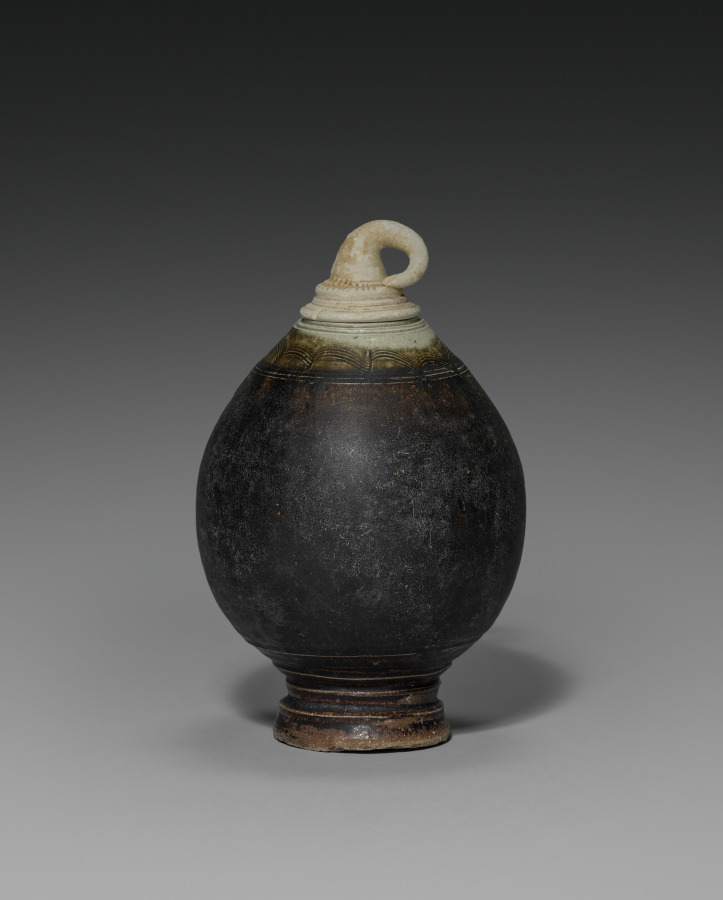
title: Jar in the Shape of a Fruit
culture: Cambodia, Northeast Thai kiln, Khmer Ware, Angkor Wat/Bayon period, 12th century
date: 1100s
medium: glazed pottery with brown slip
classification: Ceramic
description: This dark-brown glazed jar, with the heavy clay body and translucent glaze on the cover and the top just below it, has a rare shape of a fruit. It has a narrow foot with several moldings and incised wavy pattern immediately below the cover which is shaped in the form of a curling fruit stem that forms a handle. It is difficult to determine what type of fruit was meant, possibly a squash.